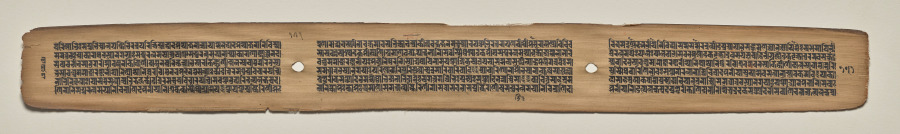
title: Text, folio 171 (verso), from a Manuscript of the Perfection of Wisdom in Eight Thousand Lines (Ashtasahasrika Prajnaparamita-sutra)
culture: Eastern India, Bihar, Vikramashila Monastery. Painting: Nepal, Kathmandu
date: Sunday, September 14, 1119 (year 239 of the Newar Samvat in the month of Ashvina)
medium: gum tempera and ink on palm leaves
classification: Painting